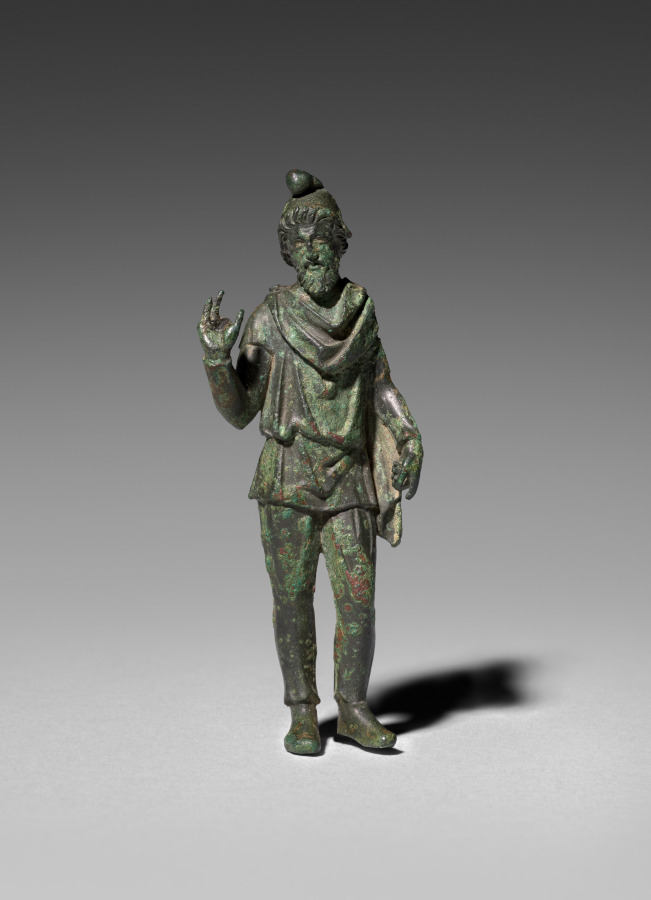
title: Barbarian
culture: Italy, Rome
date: 1–100 CE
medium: bronze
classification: Sculpture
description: This bearded figure wears a tunic, trousers, and a soft conical hat with the apex bent over, called a Phrygian cap. He stands with his right hand raised (missing the index and little finger) and his left leg slightly bent. The figure originally held an implement in his lowered left hand, whose fingers curve around a shaft. The garments and cap identify him as a foreigner, likely a Dacian. Emperor Trajan (reigned AD 98–117) fought two military campaigns against Dacia (modern-day Romania), where he conquered and annexed the southern half of the region.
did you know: This figure may have decorated an ornate parade breastplate on a horse.